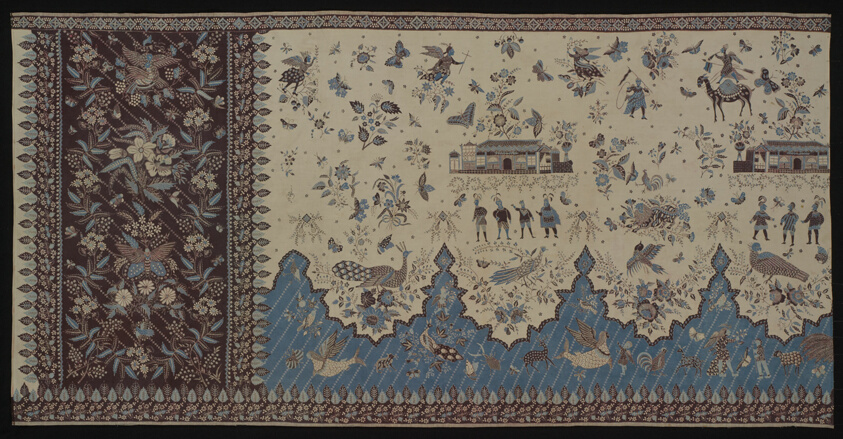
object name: Textile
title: Tubular Skirt (Sarong)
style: indonesian, javanese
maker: Indonesia, Java, North Coast, Pekalongan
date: c. 1900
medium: Cotton, plain weave; hand-drawn wax resist dyed (batik tulis)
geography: Java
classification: weaving - printed; textile